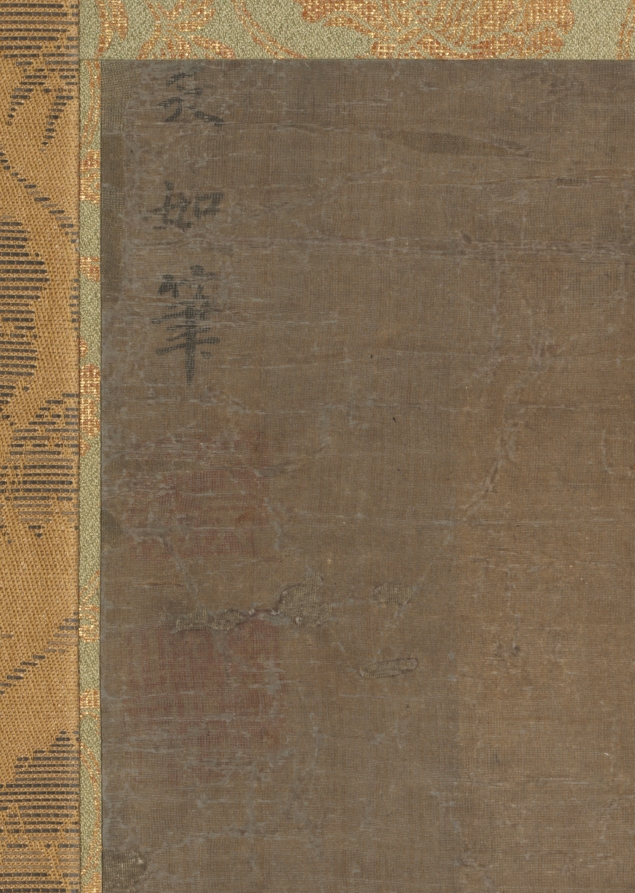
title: Narcissus and Rocks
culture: China, Ming dynasty (1368–1644)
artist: Lu Tianru (Chinese, first half of 1400s)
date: 1368–1644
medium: hanging scroll, ink on silk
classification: Painting